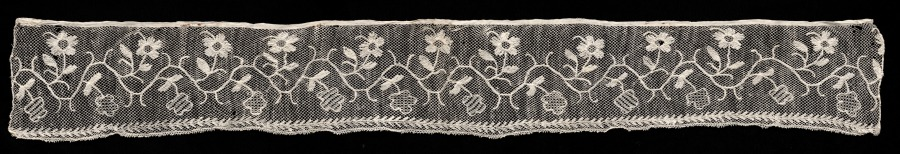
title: Band with Floral Vine Pattern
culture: Spain, c. 1850-70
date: c. 1850–70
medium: Bleached linen (est.): needle lace, filet/lacis (knotted ground and darned in one direction)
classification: Lace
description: This piece of lace is simple and honest in its decorative quality. The focus is on the floral vine, which stands out with its thick darning against the unadorned diamond ground netting.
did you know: The word lace derives from the Latin laqueus, meaning noose.